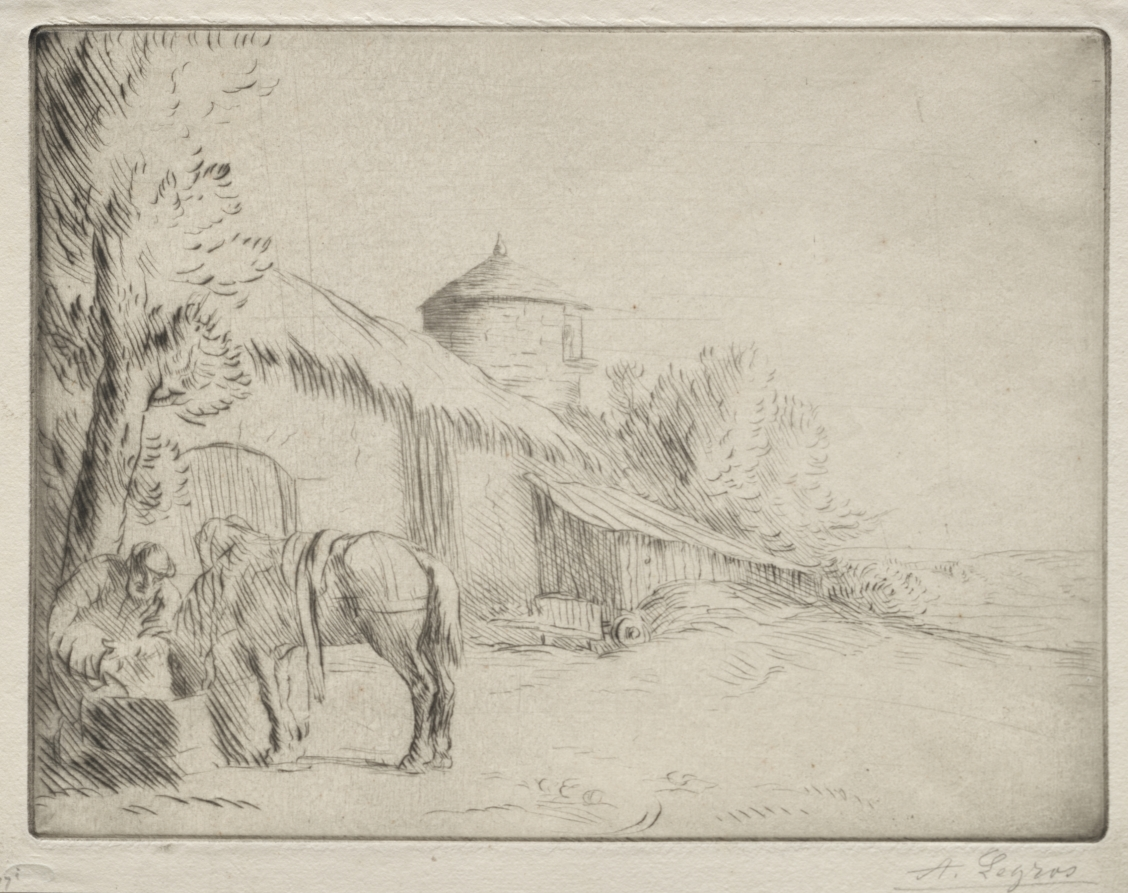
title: The Watering Place (2nd Plate)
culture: France, 19th century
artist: Alphonse Legros (French, 1837–1911)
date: c. 1857–1911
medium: drypoint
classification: Print